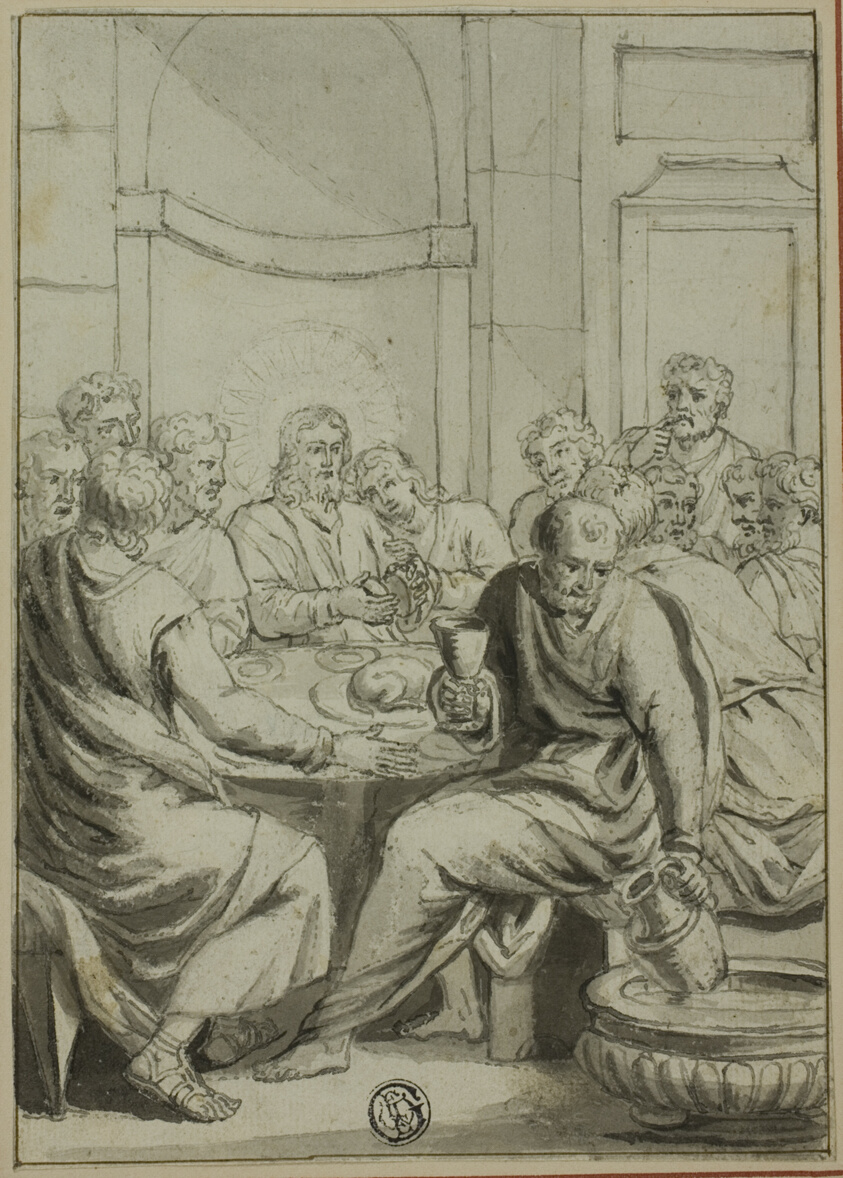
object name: Drawing and Watercolor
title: The Last Supper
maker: Unknown Artist; German, 18th century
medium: Pen and black ink, with brush and gray wash, over graphite, on ivory laid paper, edge mounted on cream wove paper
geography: Germany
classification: ink or chalk wash; drawings (visual works); prints and drawing